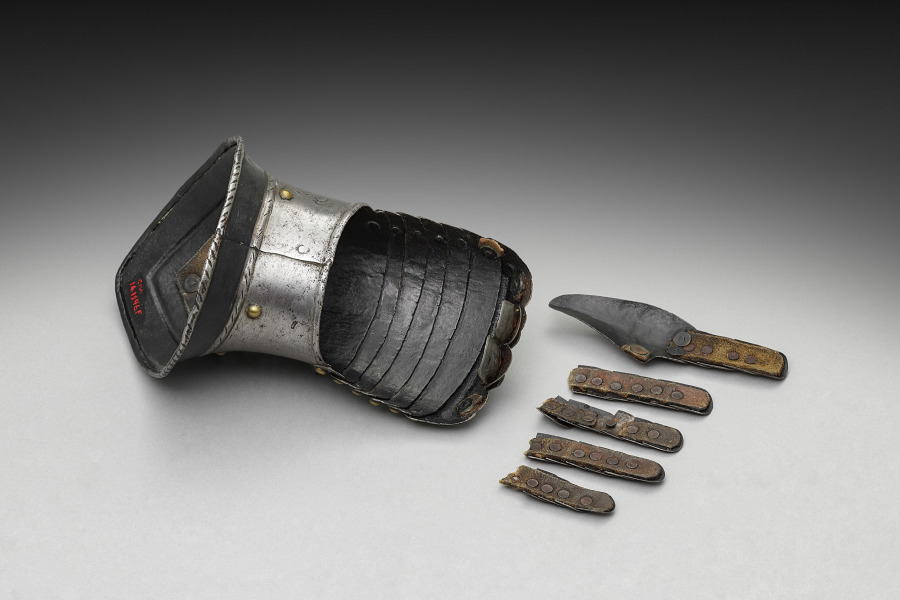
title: Left Gauntlet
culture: Germany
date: c.1550–1570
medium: iron, steel, leather and brass rivets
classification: Arms and Armor